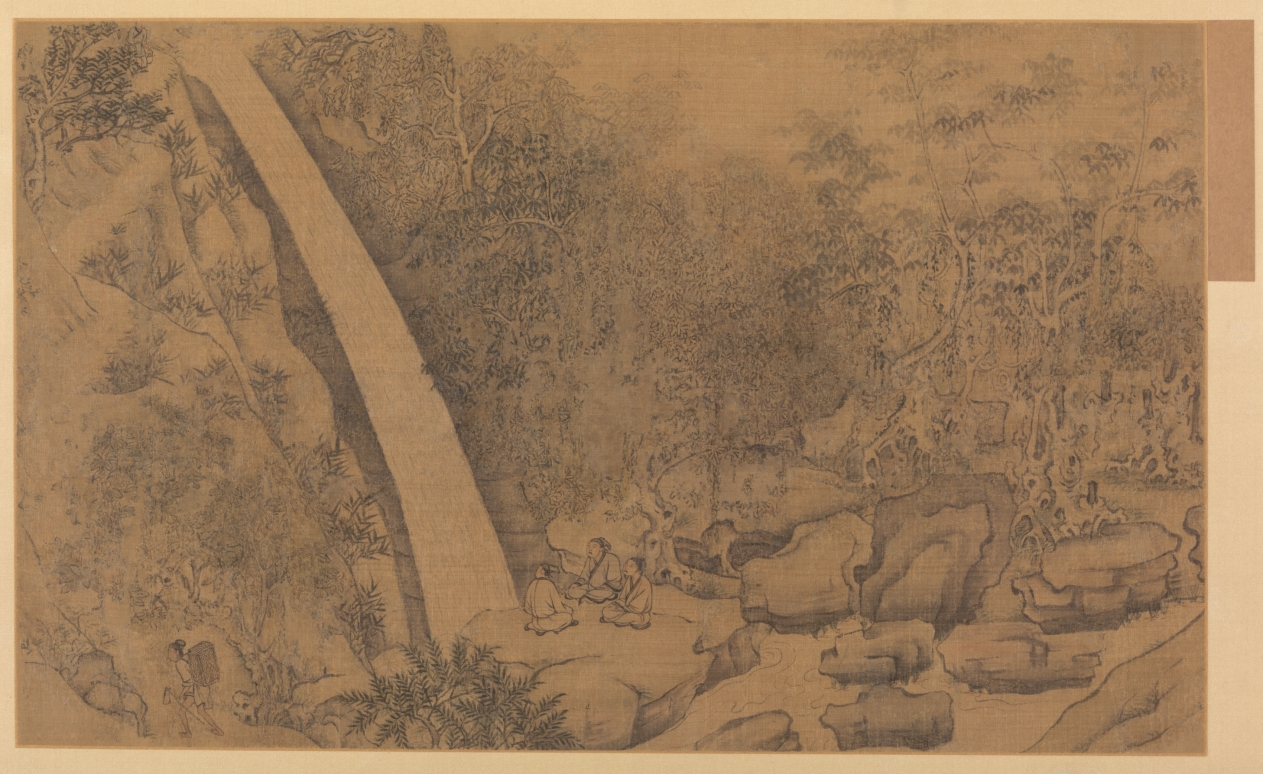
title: Dwelling in the Longmian ("Sleeping Dragon") Mountains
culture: China, Song dynasty (960-1279) - Yuan dynasty (1271-1368)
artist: follower of Li Gonglin (Chinese, c. 1049–1106)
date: 1100s-1200s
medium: handscroll mounted as an album leaf; ink and color on silk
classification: Painting